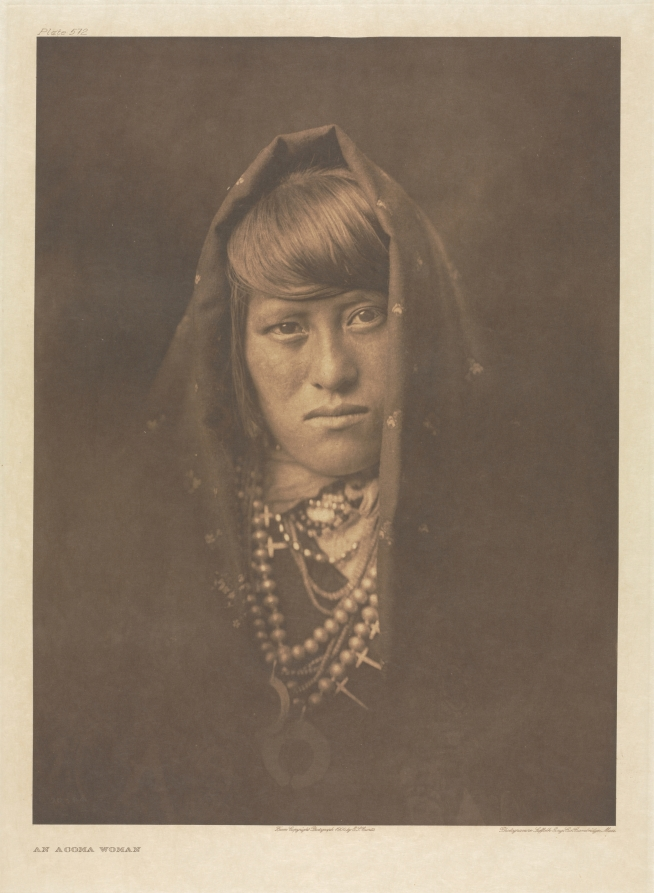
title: Portfolio XVI, Plate 572: An Acoma Woman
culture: America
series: The North American Indian: being a series of Portfolios picturing and describing the Indians of the United States, the Dominion of Canada, and Alaska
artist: Edward S. Curtis (American, 1868–1952)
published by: The University Press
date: 1904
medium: photogravure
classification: Portfolio